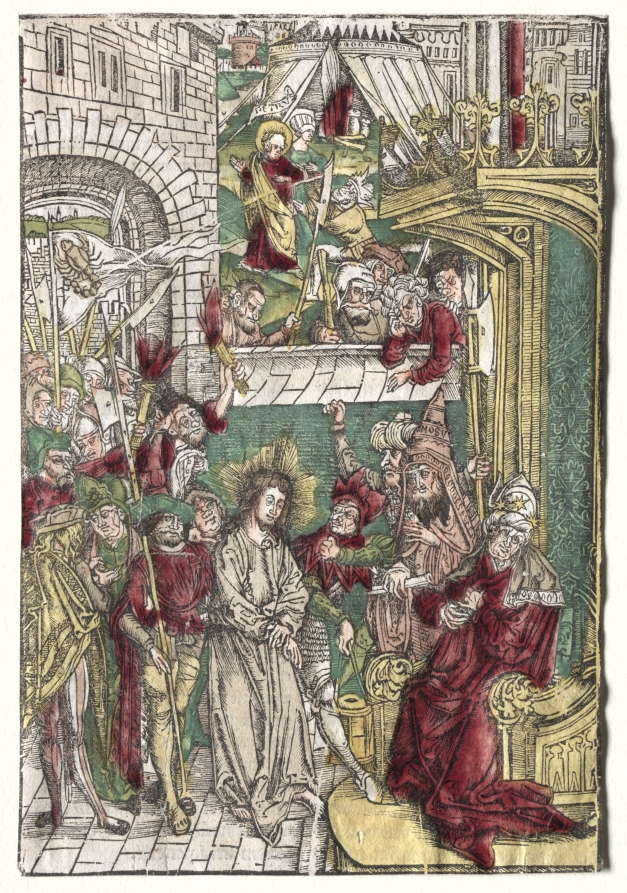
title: Life of Christ: Christ before Pilate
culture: Germany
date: 1400s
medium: woodcut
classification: Print